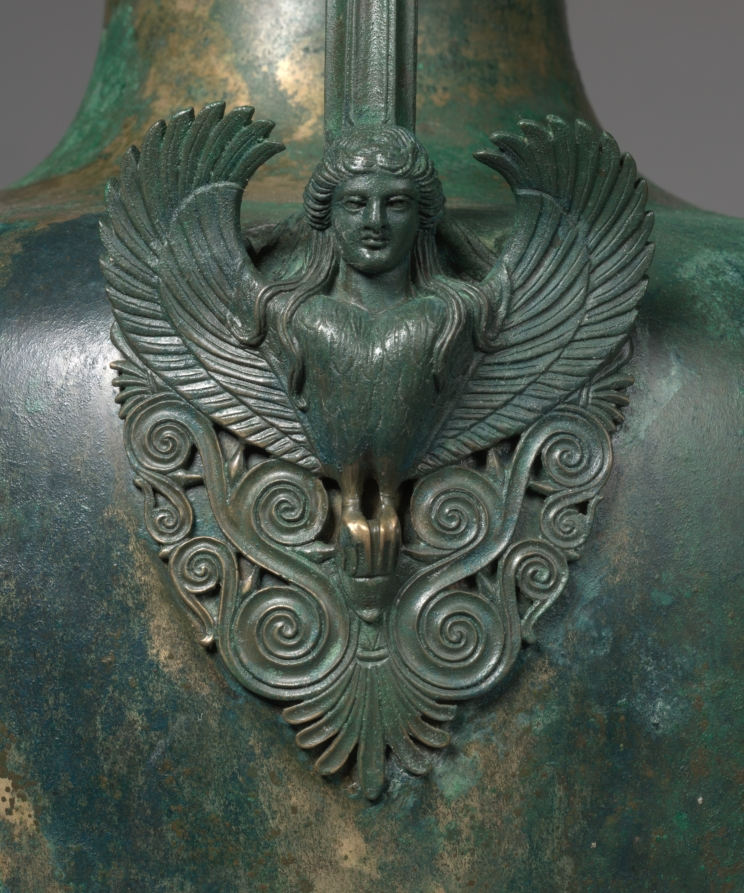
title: Hydria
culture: Greece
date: 425–400 BCE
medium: bronze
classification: Metalwork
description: This vessel gets its name from a shape of earthenware jar that was used to carry water. This bronze hydria was probably used not to carry water but as a cinerary urn (kalpis). The figure on the handle is the mythological siren, a human-headed bird.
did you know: This bronze vessel was likely used as a funerary urn.